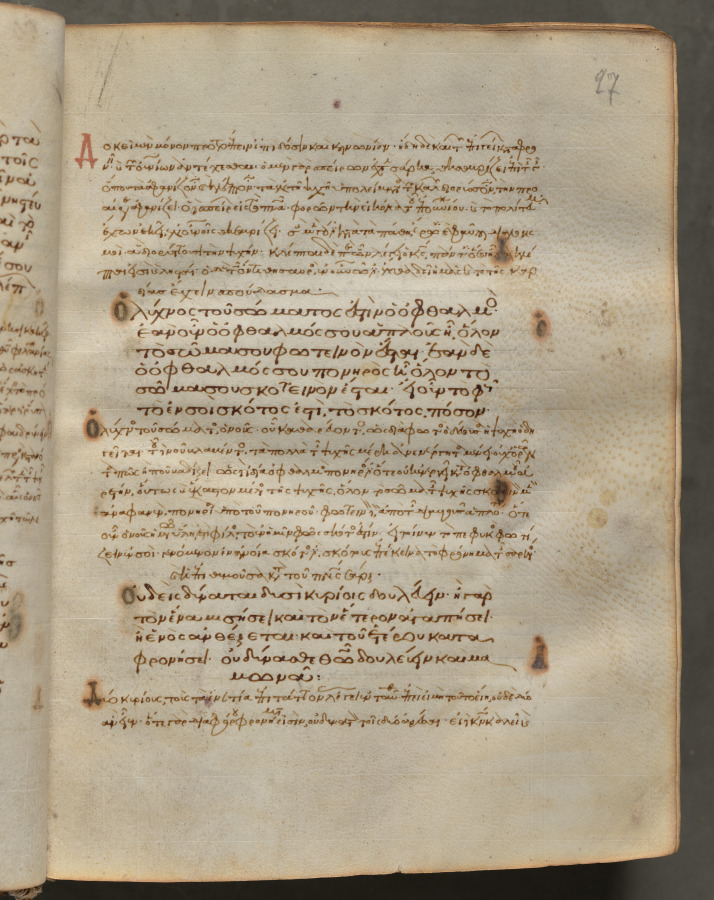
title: Text, folio 27 (recto), from a Gospel Book with Commentaries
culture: Byzantium, Constantinople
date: c. 1000–1100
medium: ink, tempera, and gold on vellum; leather binding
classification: Bound Volume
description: Each of the four gospels in this book opens on a page with brilliantly illuminated borders depicting the author of the text as well as birds—principally peacocks, symbols of the immortality of the soul—and fountains, representing the fountain of life and the salvation of the soul. This volume consists of 428 leaves with texts in Greek. Its level of sophistication suggests that it was probably written and decorated in a monastery in Constantinople.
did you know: Gospel books were carried in procession through Byzantine churches.